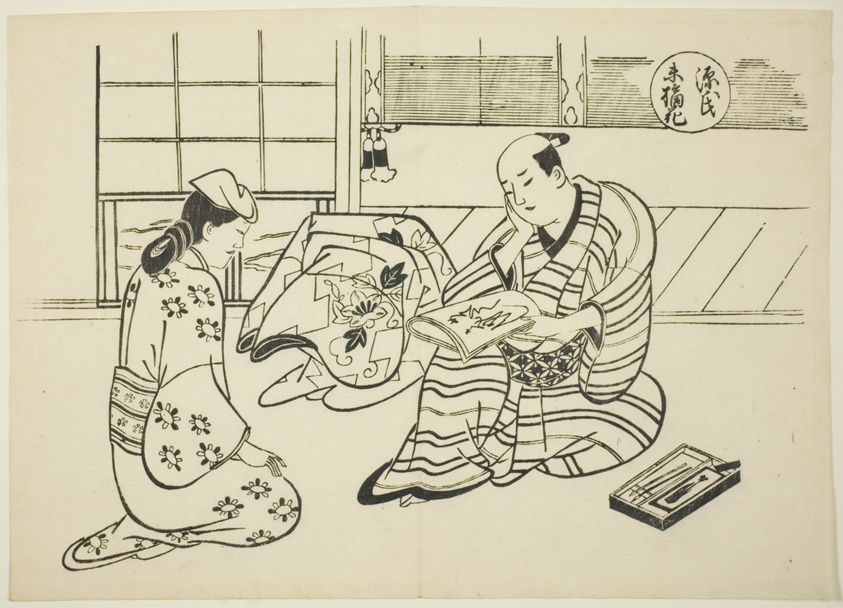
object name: Print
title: The Suetsumuhana Chapter from "The Tale of Genji" (Genji Suetsumuhana), from a series of Genji parodies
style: Japanese (culture or style)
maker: Okumura Masanobu (Japanese, 1686-1764)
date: c. 1710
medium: Woodblock print; oban, sumizuri-e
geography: Japan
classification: woodblock print; print; asian art; woodblock